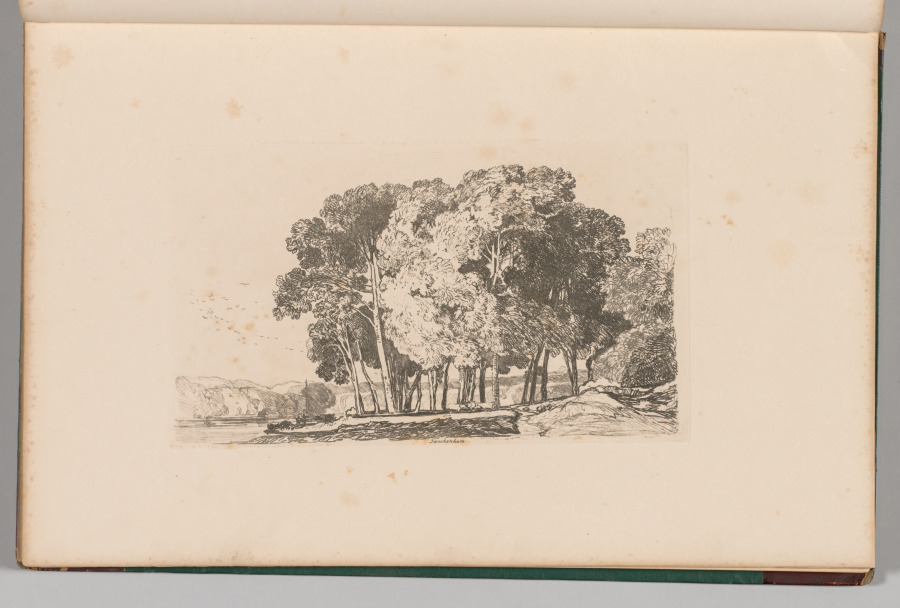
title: Liber Studiorum: Plate 3, Trees near Twickenham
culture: England, 19th century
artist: John Sell Cotman (British, 1782–1842)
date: 1838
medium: softground etching, from a bound volume containing 48 plates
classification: Bound Volume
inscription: In plate, within image, upper right: 3; in plate, below image: Twickenham